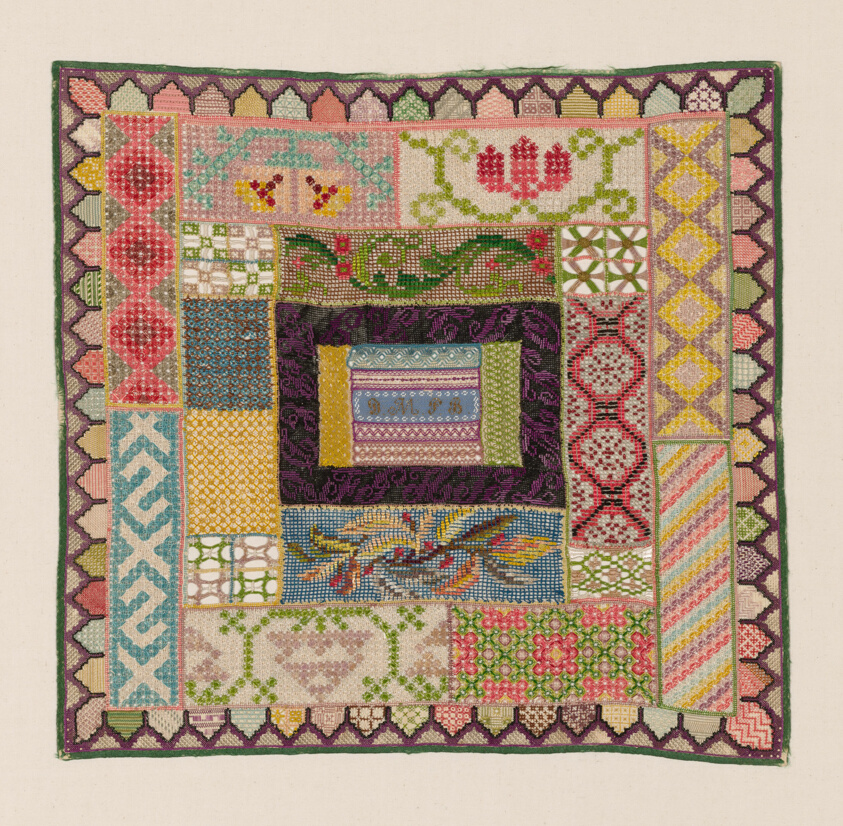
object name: Textile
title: Sampler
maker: Mexico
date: 1825/75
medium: Linen, plain weave; cut and drawn work embroidered with silk floss in Algerian eye, back, buttonhole, coral, cross, detached chain, feather, hem, herringbone, interlocking lace, knotted back, knotted insertion, long-armed cross, overcast, Roman, running (pattern darning), Russian overcast, satin, square open work, and wave stitches; darned, open buttonholed, overcast, and zig-zag overcast bars; darned and satin squares; darned and woven wheels; French knots; beaded with glass and metal beads; edged with 2/2 silk, twill weave tape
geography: Mexico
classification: textile; needlework (visual works); sampler